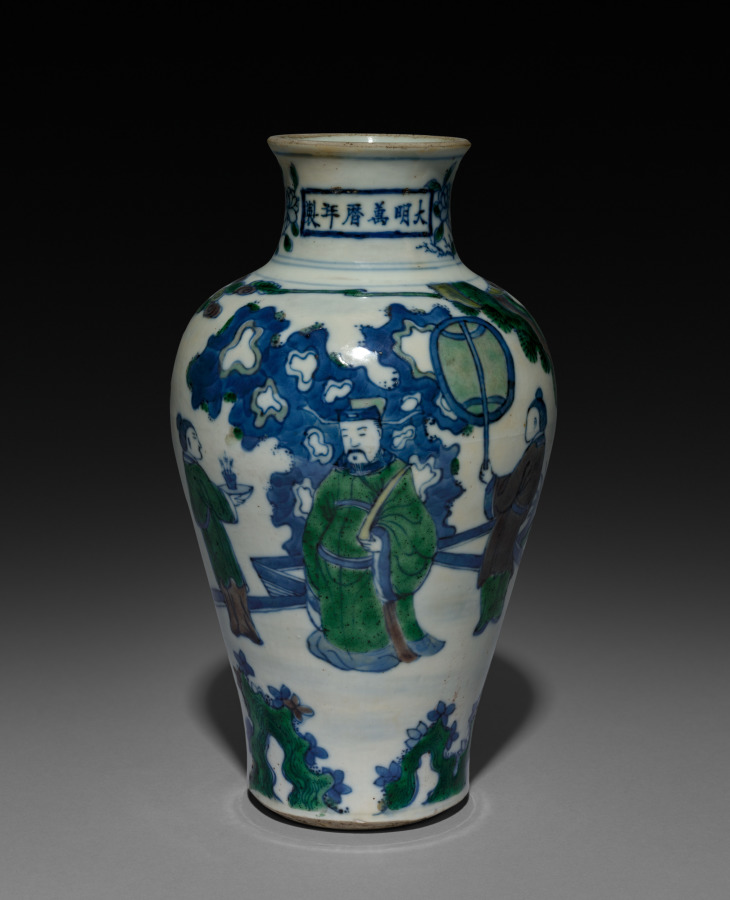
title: Vase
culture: China, Jiangxi province, Jingdezhen kilns, Ming dynasty (1368-1644), Wanli reign (1572-1620)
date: 1573–1620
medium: porcelain with underglaze blue decoration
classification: Ceramic